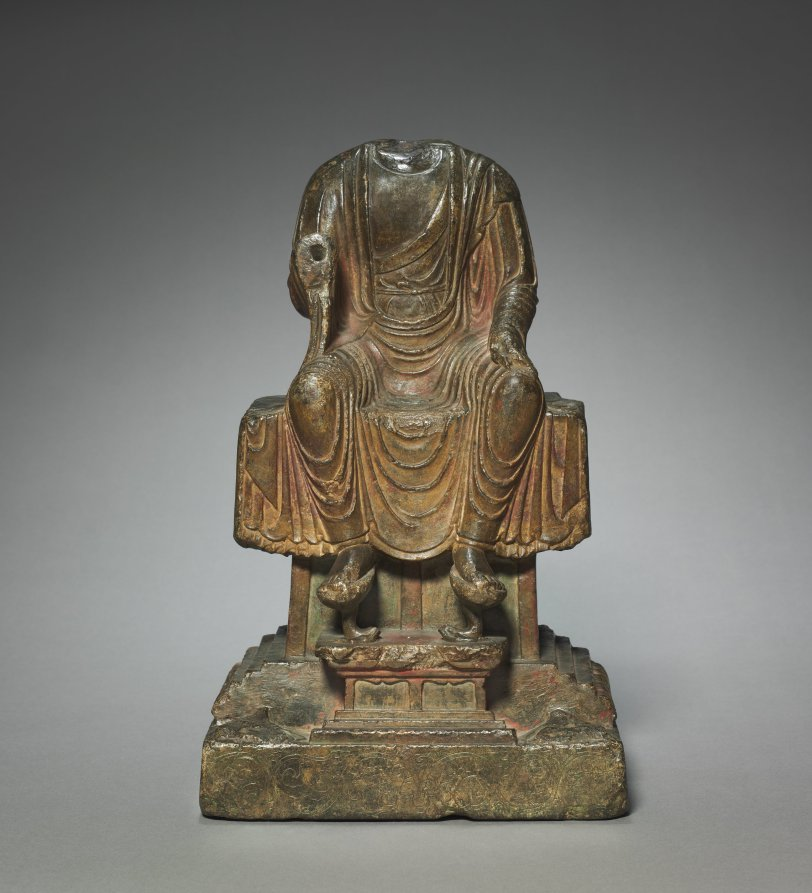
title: Mi-lê: Maitreya Buddha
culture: China, Tang dynasty (618-907)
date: 683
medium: limestone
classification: Sculpture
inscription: translation of inscription on the base: "On the eighth day of the second month of the second year of Yung-ch'un, the bhiksu Tz'u-(?) of the temple Hu-chung-ssu had this image of Maitreya and two attendant bodhisattvas made for the devotion of his whole family." (wkh)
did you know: Each of the Maitreya's feet is supported by a lotus blossom.